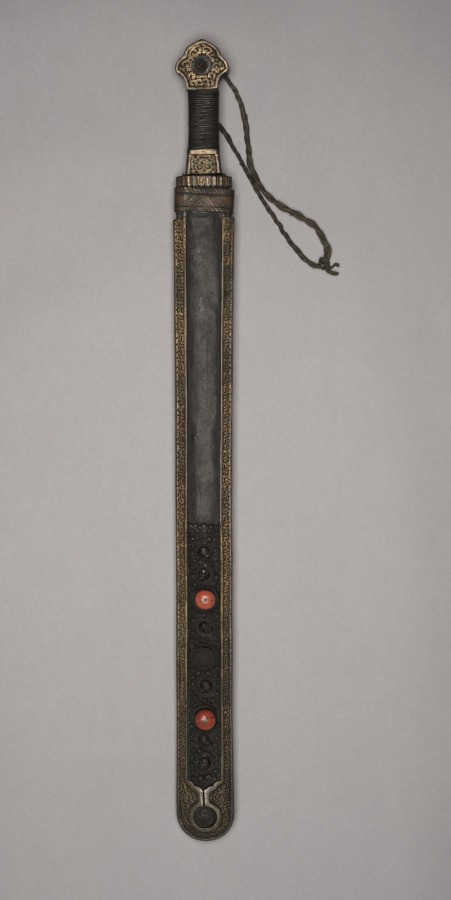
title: Sword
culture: India, Bhutan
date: 1800s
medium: iron with gilt and leather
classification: Arms and Armor